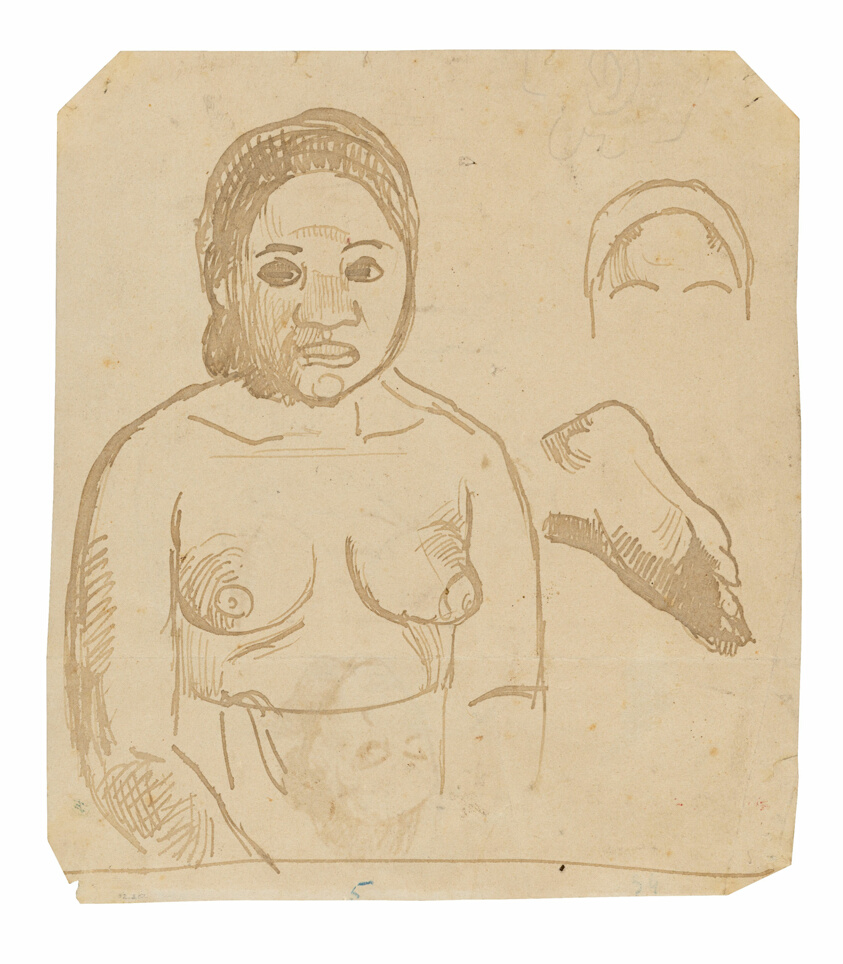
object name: Drawing and Watercolor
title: Seated Tahitian Woman (recto); Standing Tahitian Woman (verso)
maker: Paul Gauguin (French, 1848-1903)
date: 1891/93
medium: Pen and brown ink (originally purple, est.), with graphite, on cream wove paper (recto); pen and brown ink (originally purple, est.), with traces of graphite, on cream wove paper; removed from a sketchbook and trimmed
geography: France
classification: pen and ink drawings; drawings (visual works); prints and drawing